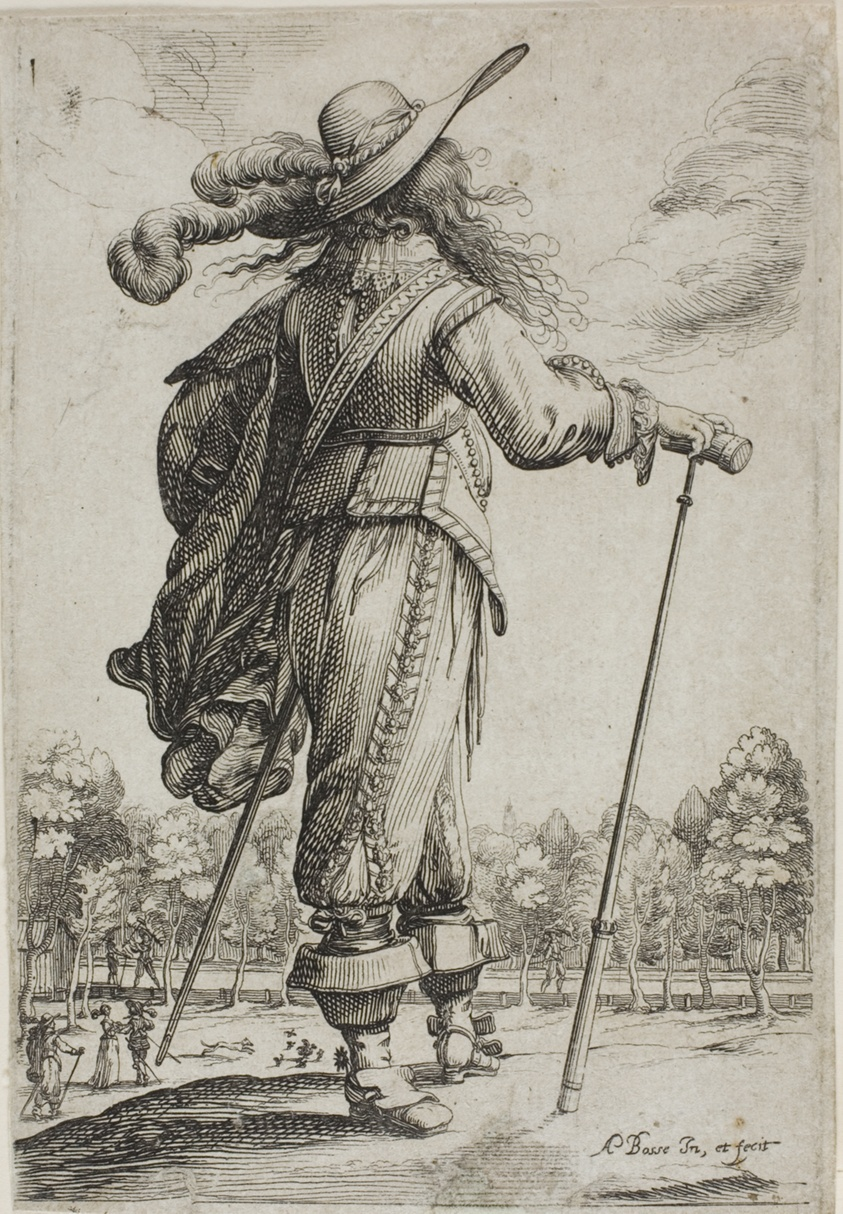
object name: Print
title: Man with a Cane, seen from behind, from The Garden of French Nobility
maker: Abraham Bosse (French, 1602-1676)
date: 1629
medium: Etching and engraving on ivory laid paper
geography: France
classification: engraving; print; prints and drawing